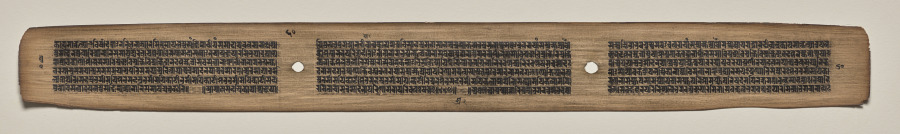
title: Text, Folio 60 (verso), from a Manuscript of the Perfection of Wisdom in Eight Thousand Lines (Ashtasahasrika Prajnaparamita-sutra)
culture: Eastern India, Bihar, Vikramashila Monastery. Painting: Nepal, Kathmandu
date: Sunday, September 14, 1119 (year 239 of the Newar Samvat in the month of Ashvina)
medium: gum tempera and ink on palm leaves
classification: Painting